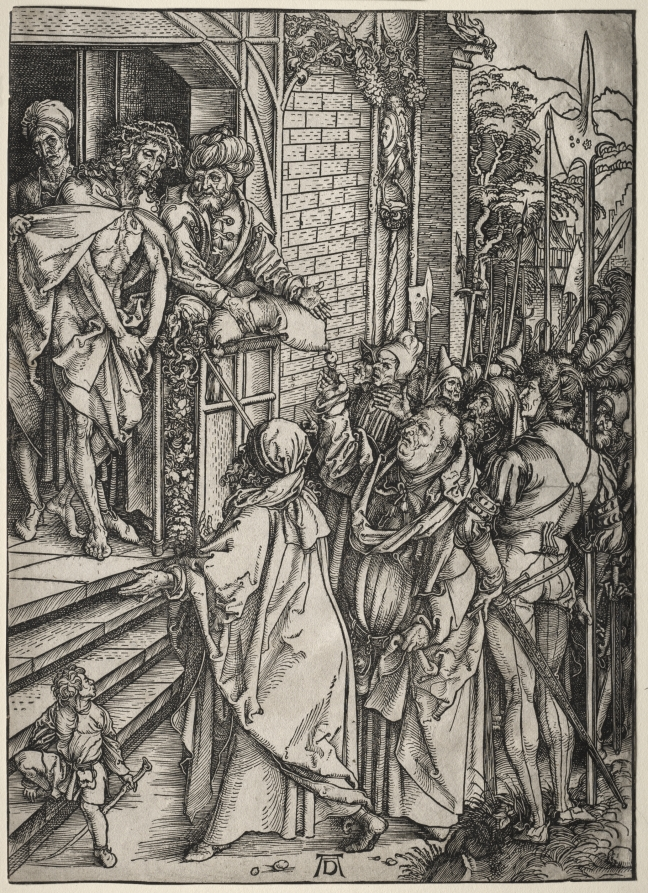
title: The Great Passion: Christ Shown to the People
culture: Germany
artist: Albrecht Dürer (German, 1471–1528)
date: c. 1497–1510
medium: woodcut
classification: Print